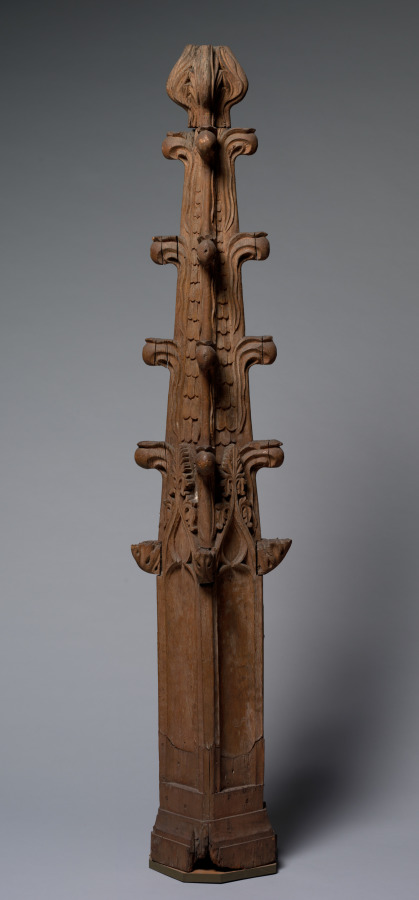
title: Pinnacle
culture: France, 15th century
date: 1400s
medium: oak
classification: Furniture and woodwork